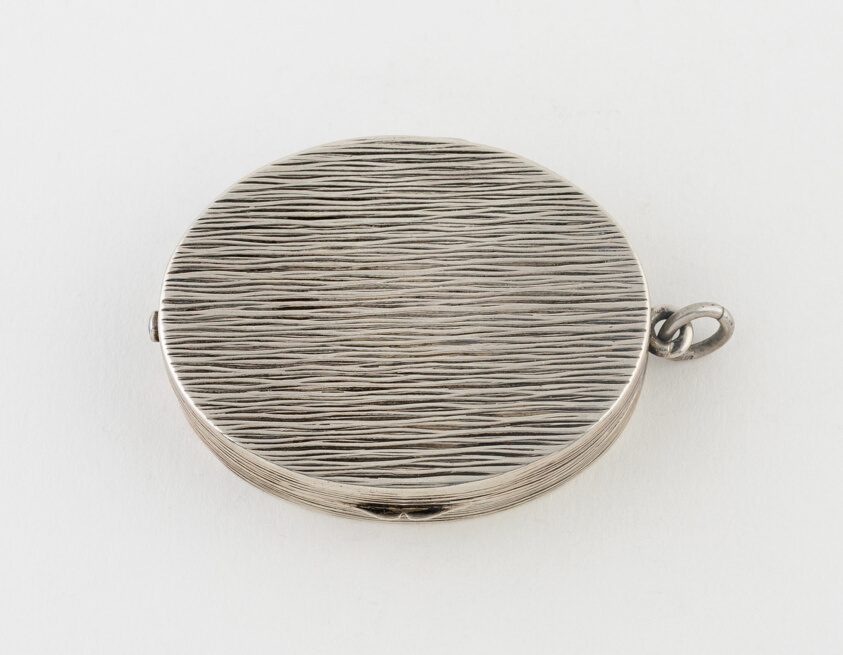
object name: Metalwork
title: Medicine Box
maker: Possibly England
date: c. 1840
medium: Silver and blue semi-precious stone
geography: England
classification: container for personal use; box; european decorative arts; metalwork; silver; decorative object/ornament